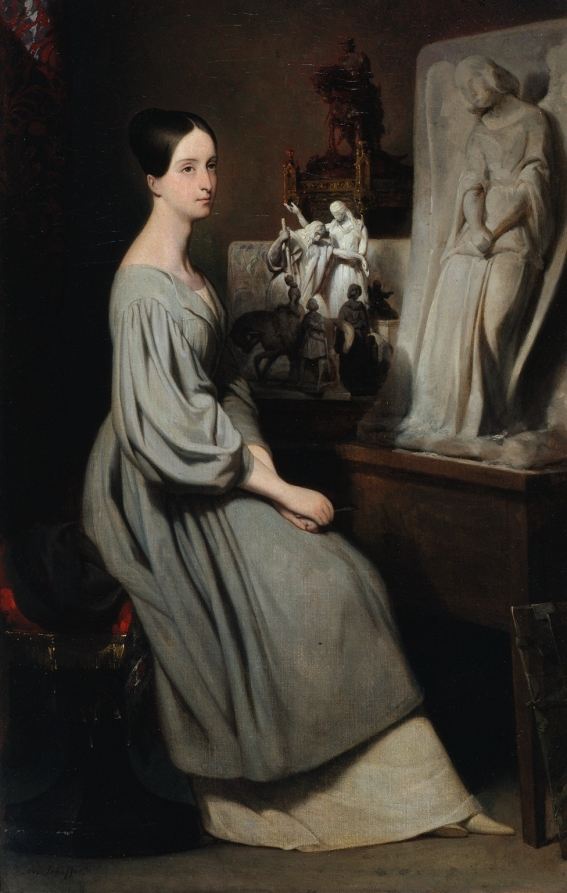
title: Princess Marie d'Orléans in Her Studio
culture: France, 19th century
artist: Ary Scheffer (Dutch, 1795–1858)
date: c. 1838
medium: oil on fabric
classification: Painting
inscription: Signed lower left: Ary Scheffer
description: Scheffer frequently portrayed his favorite pupil, the Princess Marie d'Orléans (1813-1839), daughter of King Louis Philippe and a prominent sculptor. As proof of her dedication and talent, she wears an artist's smock and holds a chisel. Seen nearby are several of her works, including her model of her most famous sculpture, a stoic depiction of Joan of Arc.